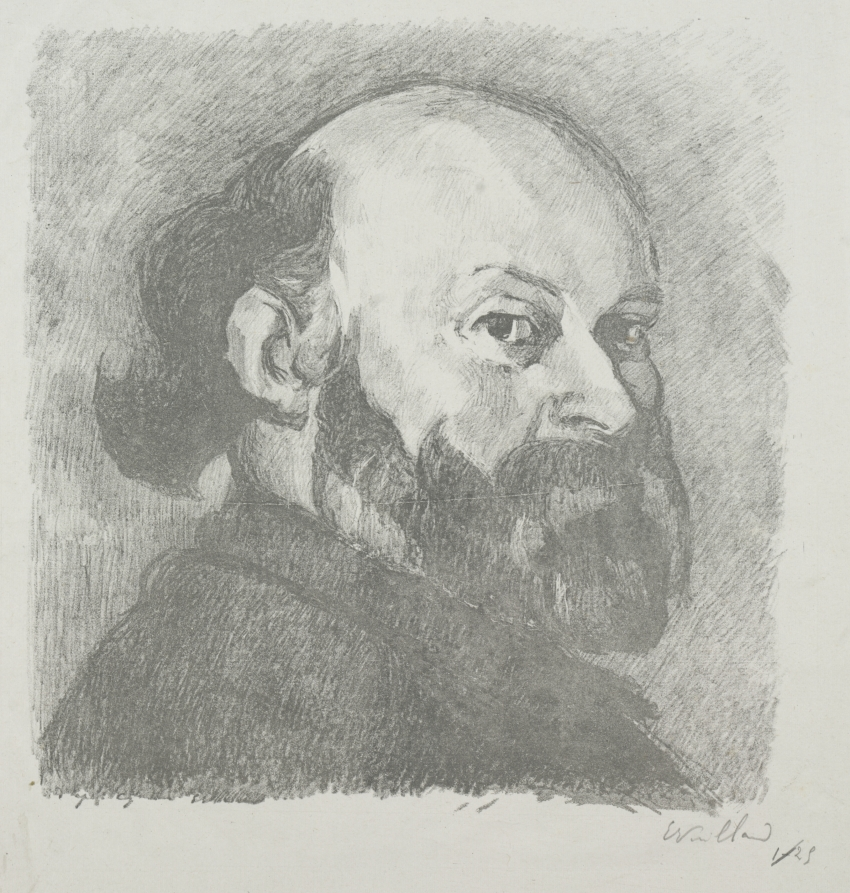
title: Paul Cézanne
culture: France, 19th-20th century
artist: Édouard Vuillard (French, 1868–1940)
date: 1914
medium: lithograph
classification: Print